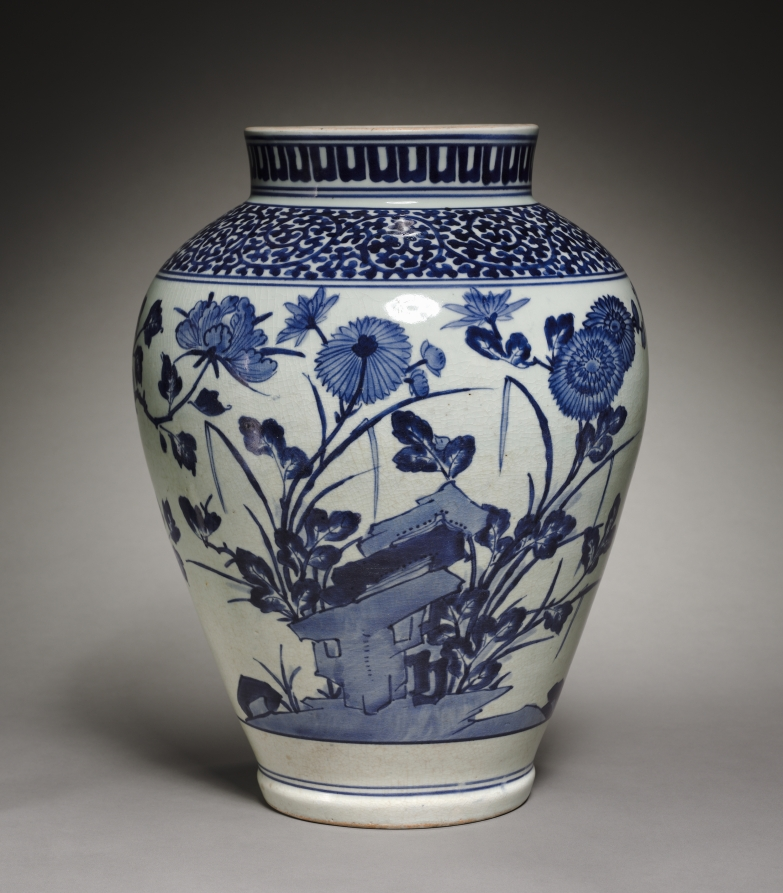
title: Large Jar with Peonies, Orchids, and Chrysanthemums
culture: Japan, Edo period (1615–1868)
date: late 1600s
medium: Porcelain with underglaze blue decoration (Imari ware)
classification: Ceramic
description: Spring peonies, summer orchids, and autumn chrysanthemums bloom at the same time amid garden rocks. These underglaze blue motifs were inspired by similar designs on Chinese ceramics made for export to Europe. In the early 1600s, Korean potters in Japan discovered kaolin, the clay essential for porcelain production. At the same time, political turmoil in China following the collapse of the Ming dynasty (1368–1644) disrupted Chinese exports. Together, these circumstances created an opportunity for Japan to supply ceramics to the European market. Careful study of Chinese prototypes shaped the work of Japanese ceramists for both domestic and overseas audiences.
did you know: This design shows the changing of the seasons: one side depicts a peony blossom in the spring, and the other side continues with chrysanthemums and an orchid in the autumn.